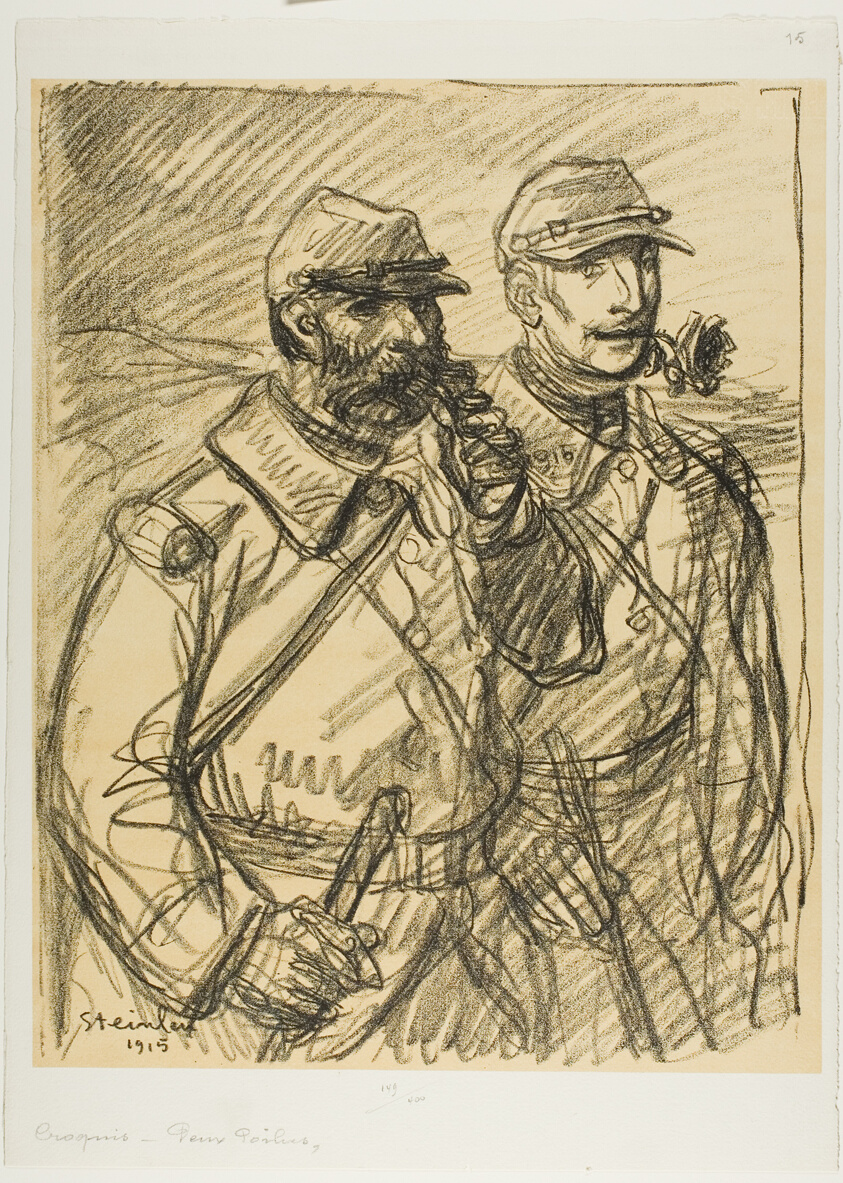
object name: Print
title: Two Soldiers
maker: Théophile-Alexandre Steinlen; French, born Switzerland, 1859-1923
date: 1915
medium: Lithograph in black over fawn tint on thick off-white wove paper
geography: France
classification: lithograph; print; prints and drawing